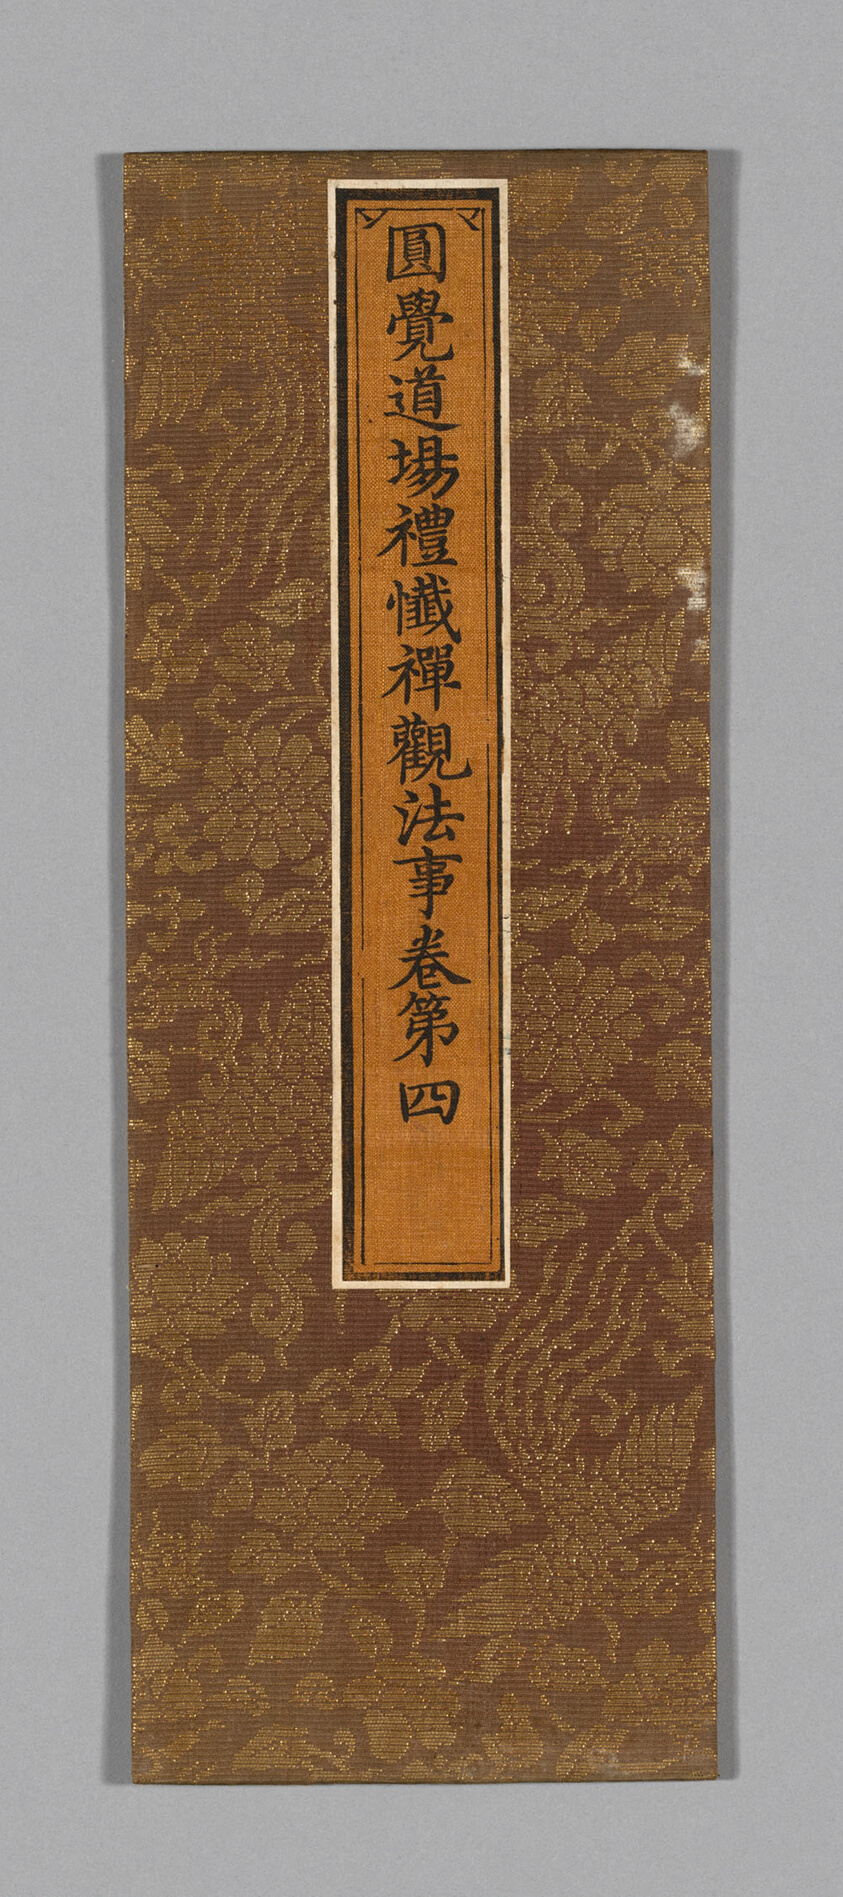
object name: Textile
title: Sutra Cover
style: ming, Chinese (culture or style), East Asian, asian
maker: China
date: Ming dynasty (1368–1644), c. 1590's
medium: Silk and gold-leaf-over-lacquered-paper strip, gauze weave with supplementary patterning wefts; label: silk, plain weave; painted in ink; glued to paper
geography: China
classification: textile; weaving